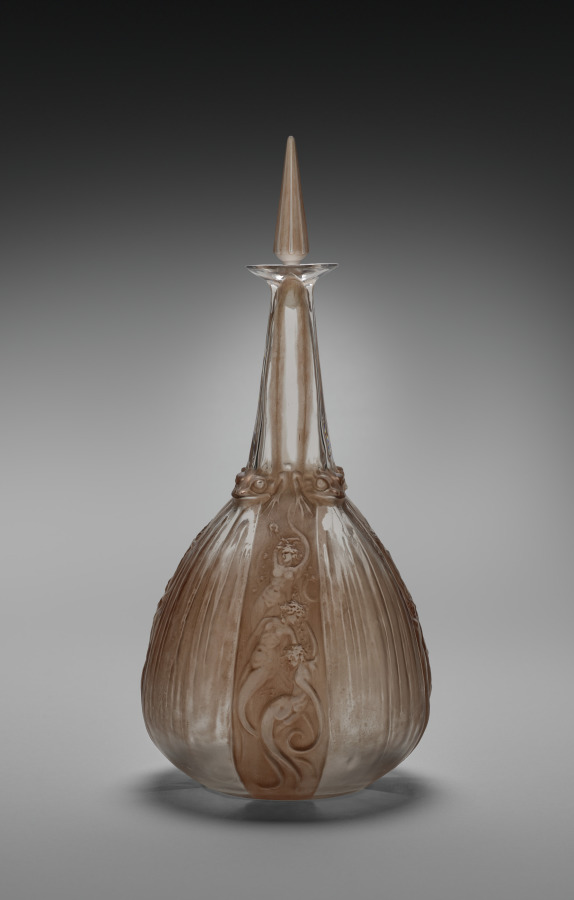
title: Mermaids and Frogs Decanter (Carafe sirènes et grenouilles)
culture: France, 20th century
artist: René Lalique (French, 1860–1945)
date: 1917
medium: glass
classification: Glass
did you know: The title of this work translates to mermaids and frogs carafe.